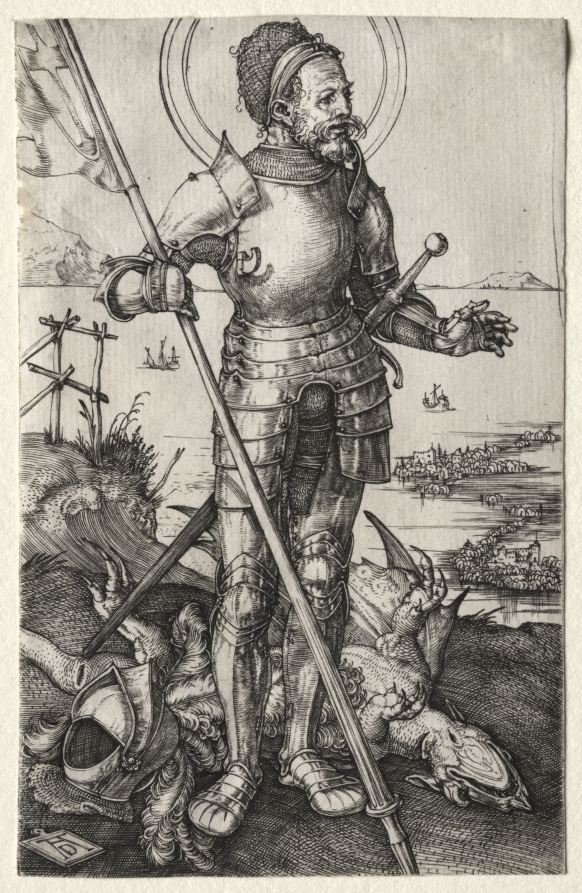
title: St. George on Foot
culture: Germany, early 16th Century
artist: Albrecht Dürer (German, 1471–1528)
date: c. 1504–5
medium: engraving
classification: Print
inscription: lower left, in plate: AD[in monogram] ; VERSO, upper left, in graphite: 53 ; center, in graphite: B. 53 ; lower left, in graphite: L 1150 ; lower left, in graphite: [Jr y?] ; lower left, in graphite: B 53